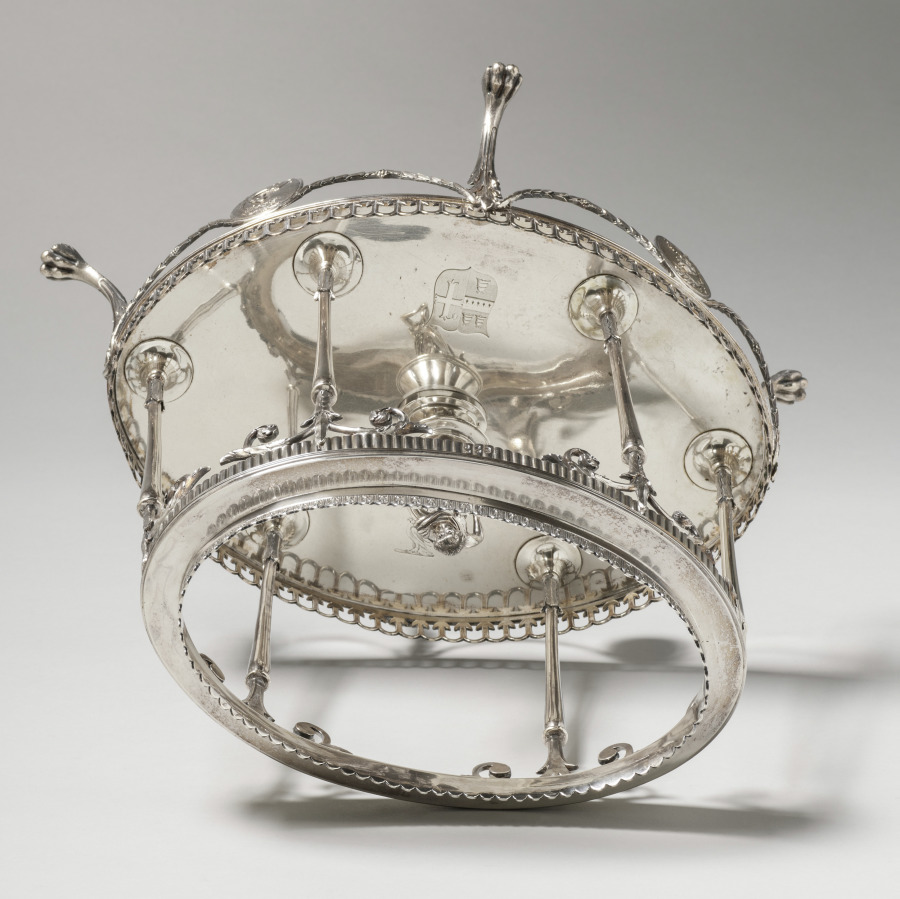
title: Centerpiece (metal stand)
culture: England, 18th century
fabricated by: William Pitts (British)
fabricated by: Joseph Preedy (British)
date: 1792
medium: silver and glass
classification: Silver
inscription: engraved: arms and crest of Bell Coat of arms with Bell impaling Brandling on flat platform.